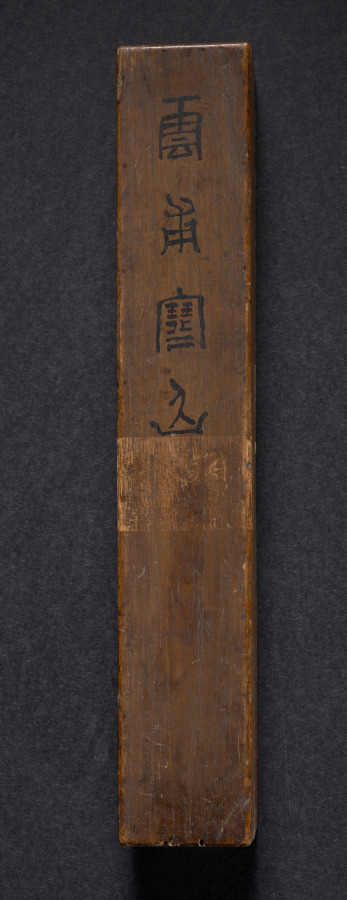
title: Kanzan Holding a Scroll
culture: Japan, Muromachi period (1392–1573)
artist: Unpo Shūkū (Japanese, active 1400s)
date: 1400s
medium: hanging scroll; ink on paper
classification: Painting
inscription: signed: "Unpo"